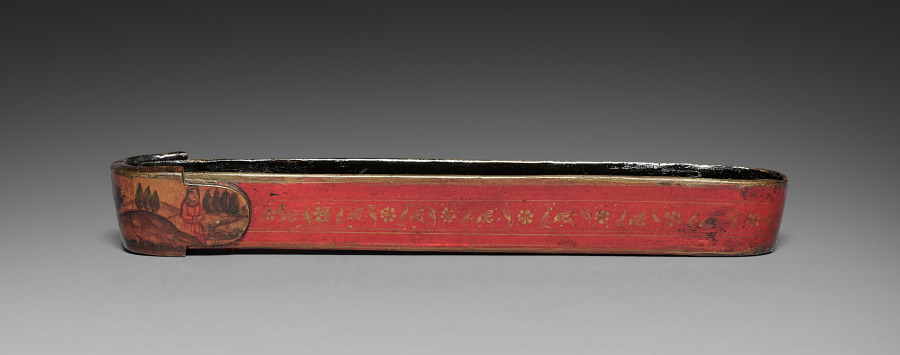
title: Pen and Ink Box (base)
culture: Iran, Qajar period (1779-1925)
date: 1800s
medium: lacquer over papier maché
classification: Lacquer